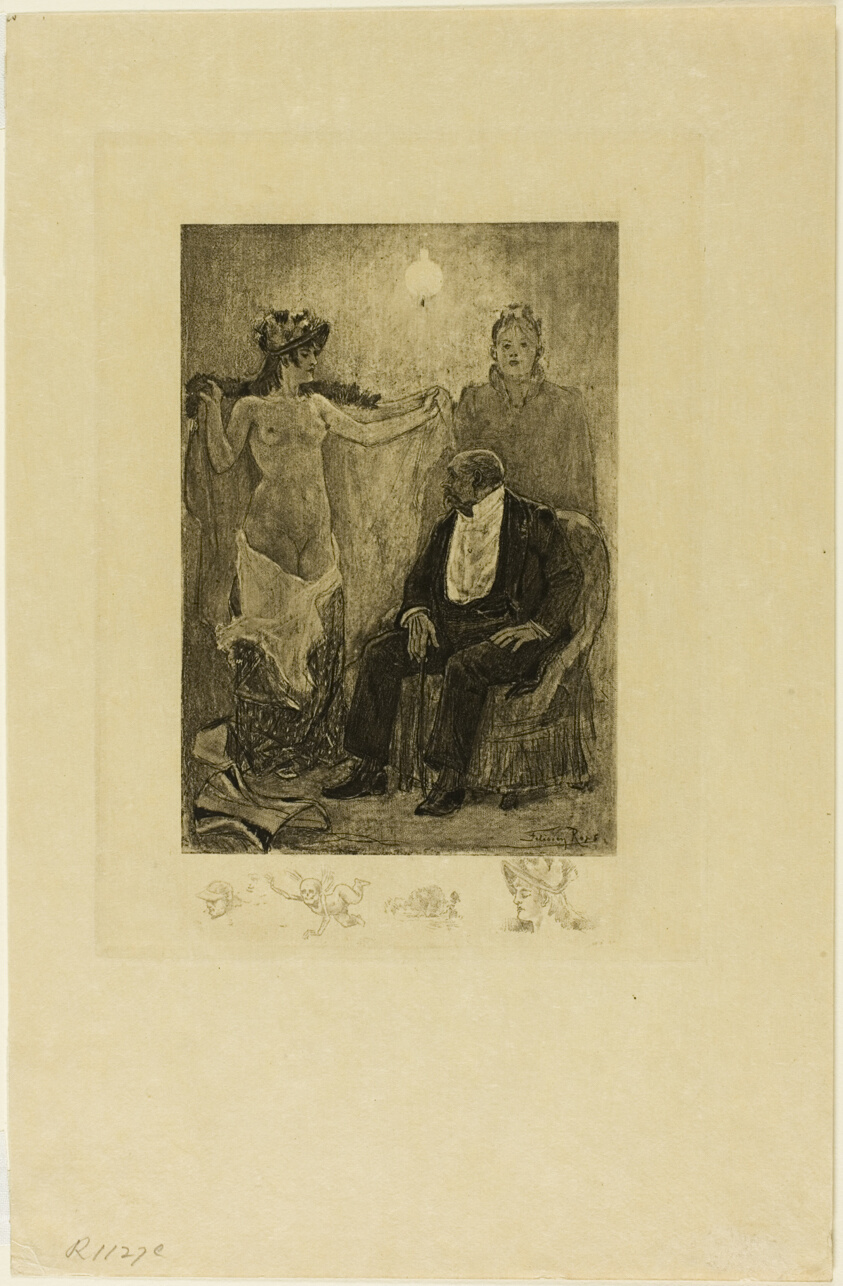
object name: Print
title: Between Acts or the Englishwoman of the New Ballet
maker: Félicien Rops (Belgian, 1833-1898)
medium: Heliogravure in black on Japanese paper vellum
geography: Belgium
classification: photogravure; print; prints and drawing